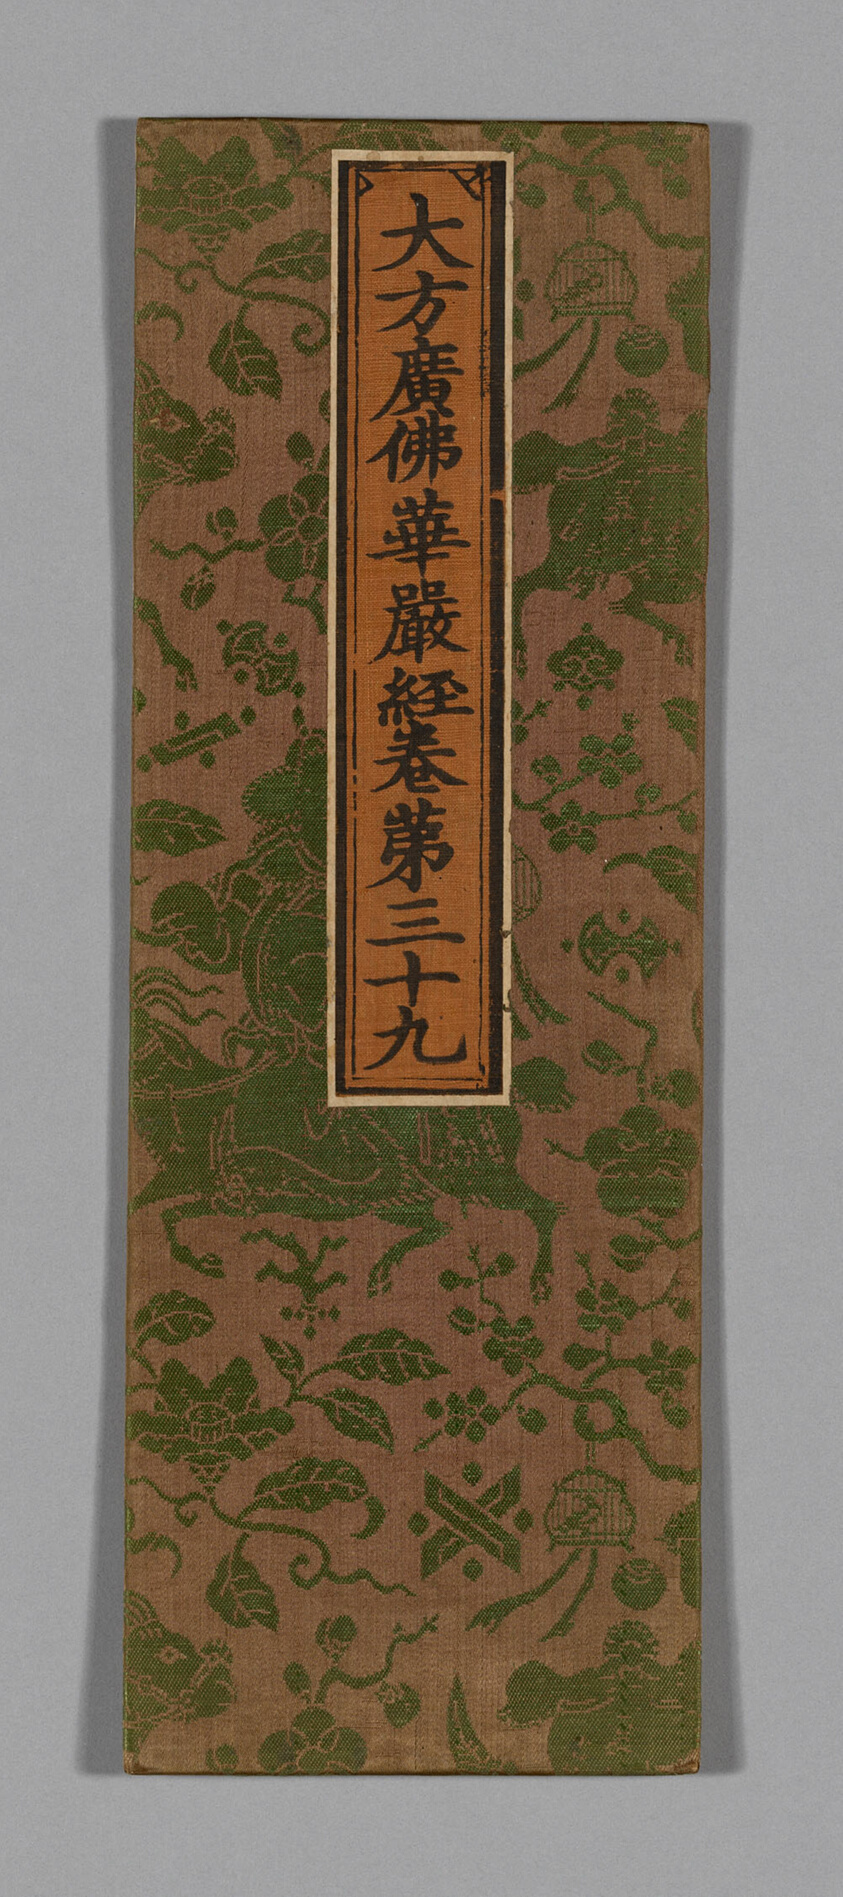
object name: Textile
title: Sutra Cover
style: ming, Chinese (culture or style), East Asian, asian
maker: China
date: Ming dynasty (1368–1644), c. 1590's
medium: Silk, warp-float faced 4:1 satin weave with supplementary patterning wefts bound in weft-float faced 1:4 satin interlacings; label: silk, plain weave; painted with ink; over paper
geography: China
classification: textile; weaving